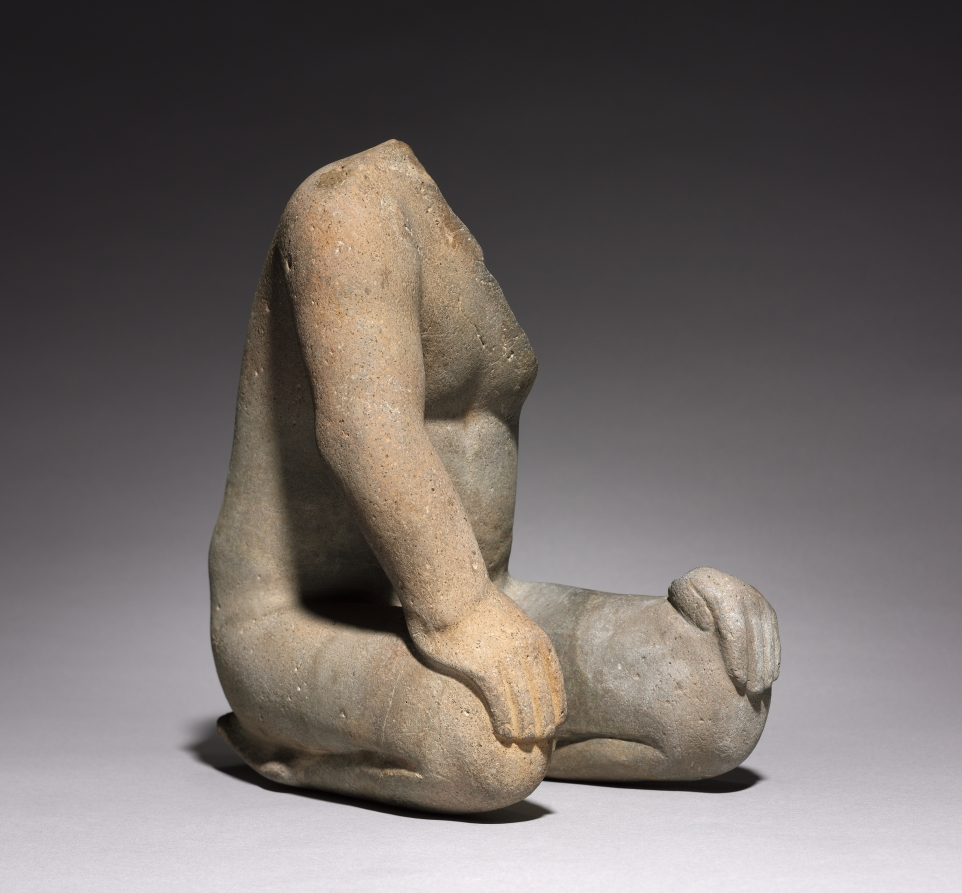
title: Kneeling Figure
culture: Mexico, Guerrero, Olmec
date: c. 1200–600 BCE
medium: stone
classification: Sculpture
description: Outside of the Maya, Olmec sculptures of humans have a naturalism unknown in other Mesoamerican artistic traditions. On this finely carved figure, the musculature of the arms, torso, and legs is carefully depicted, and even the fingernails and toenails and are shown.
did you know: An observant traveler discovered the left knee and hand fragment, orginally missing and now reunited.